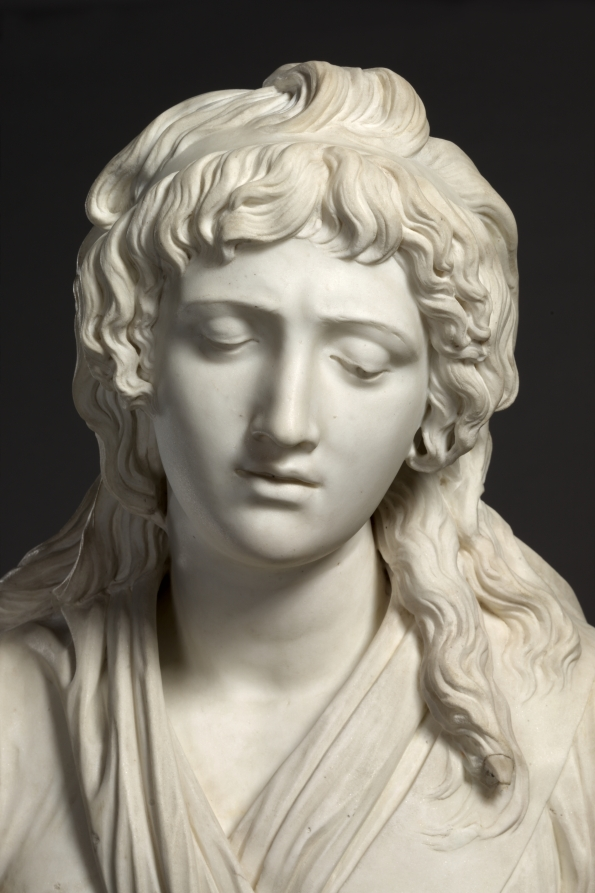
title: Funerary Monument for the Marquis de Tourney (for the Chapel of the Château de la Falaise)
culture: France, Paris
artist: François-Nicolas Delaistre (French, 1746–1832)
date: 1787–1793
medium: marble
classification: Sculpture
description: The Marquis Gallyot de Tourney commissioned this sculpture to serve as his funeral monument. It depicts a young woman gesturing with one hand toward an urn bearing the inscription Voilà ce coeur qui nous a tant aimé (Here is the heart that loved us so). The marquis specified that the figure should be a rosière, a virtuous woman of humble circumstances, a choice likely informed by the writings of Enlightenment philosophers, especially Jean-Jacques Rousseau, who championed greater social equality and democratic reform.